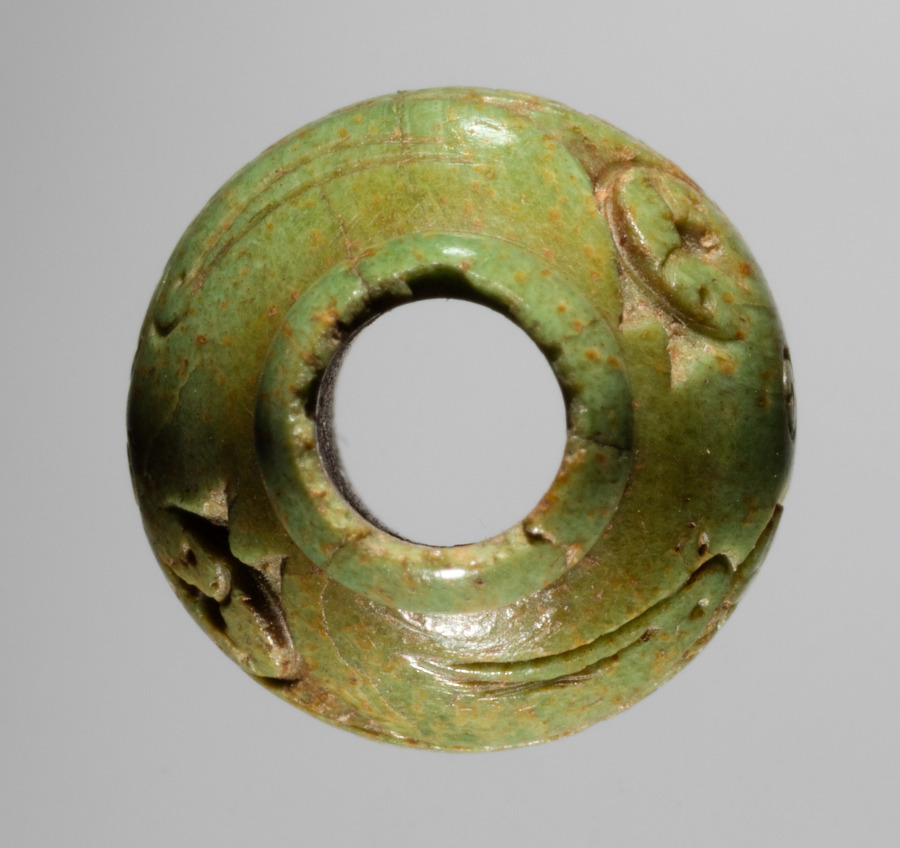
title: Spindle Whorl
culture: Iran, early Islamic period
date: 700s - 900s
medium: bone, incised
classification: Spindle Whorl